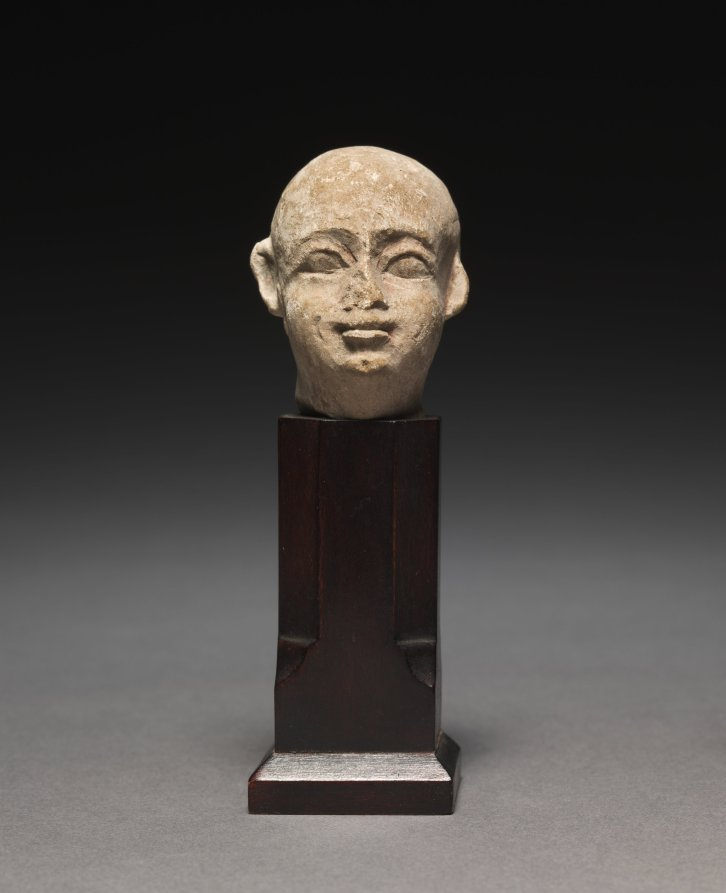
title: Small Head of a Man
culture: Egypt, Greco-Roman period (332 BCE–395 CE), Ptolemaic dynasty (305–30 BCE)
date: 305–30 BCE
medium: limestone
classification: Sculpture